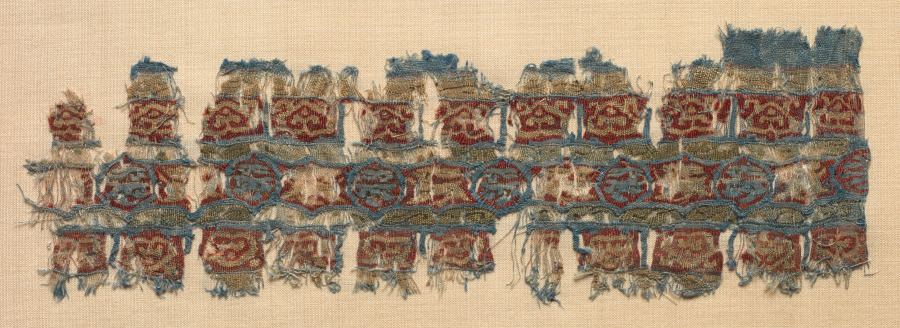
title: Fragment of a Tiraz-Style Textile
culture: Egypt, Fatimid period, Caliphate of al-Mustansir or al-Musta'li, c. AH 475-495 (1081-1101)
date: 1081 – 1101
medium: tabby ground with inwoven tapestry ornament; linen and silk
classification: Textile